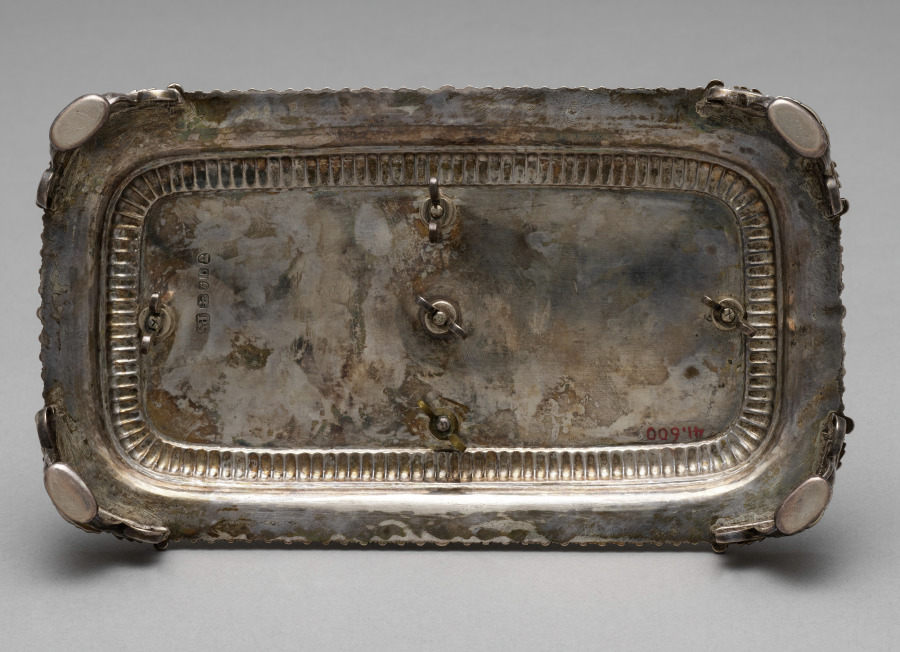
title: Cruet Stand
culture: England, London, 19th century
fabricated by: Paul Storr (British, 1771–1844)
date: 1817–1818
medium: silver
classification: Silver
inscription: Scratched underside: "56\ Eoxx\ moxx", "6087", "SRH-".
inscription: "2" engraved on base leg of vessel holder and by pin on underside of base.